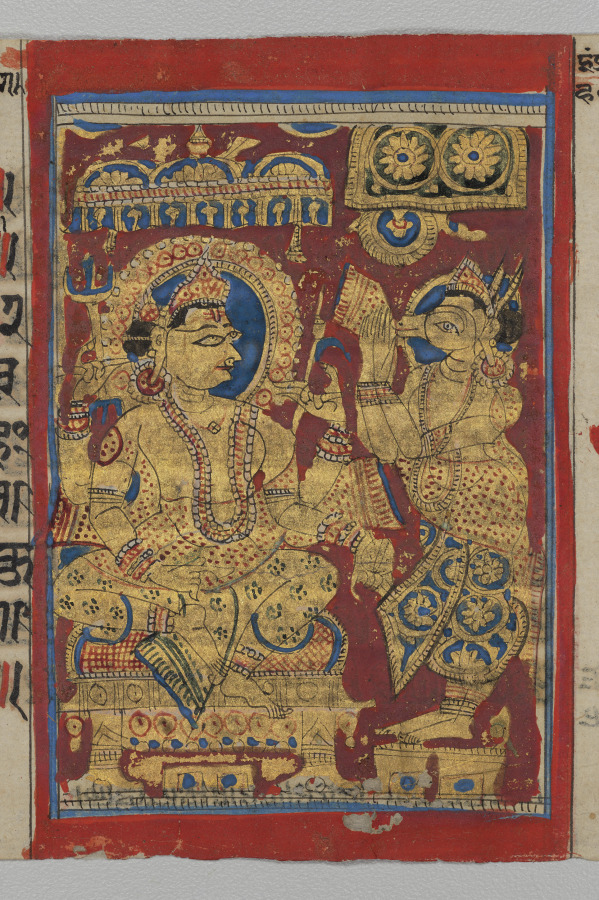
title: Indra Commands Harinaigameshin to Transfer the Embryo of Mahavira, Folio 9 (verso), from a Kalpa-sutra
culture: Western India, Gujarat, last quarter of the 15th century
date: c. 1475–1500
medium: Gum tempera, ink, and gold on paper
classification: Painting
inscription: [[upper right]] indra ādeśam dadāti Ha*